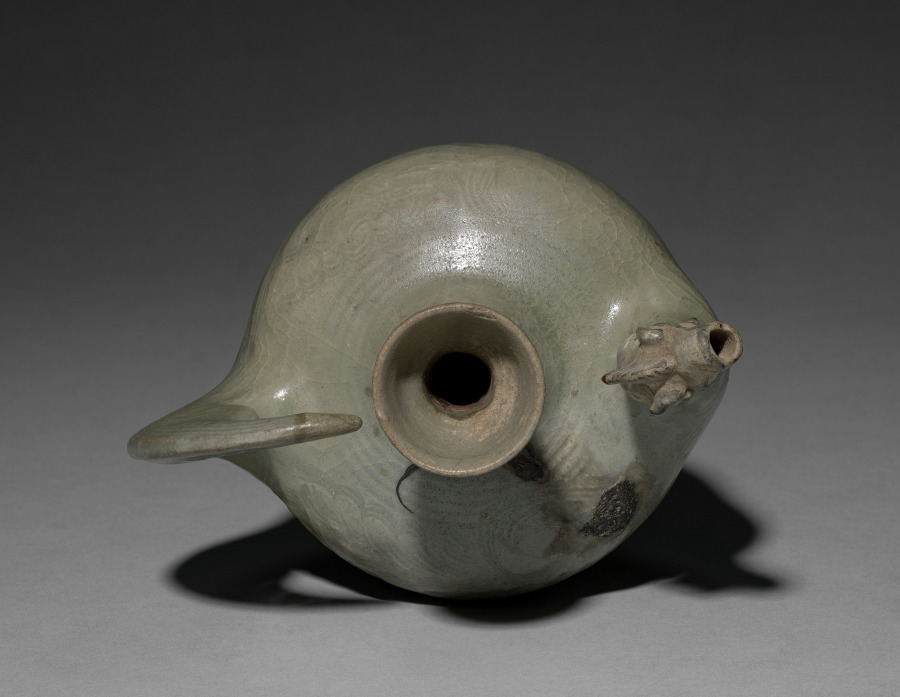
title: Pouring Vessel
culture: Siam, Sawankhalok ware, late 13th-14th Century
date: late 1200s-1300s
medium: stoneware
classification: Ceramic